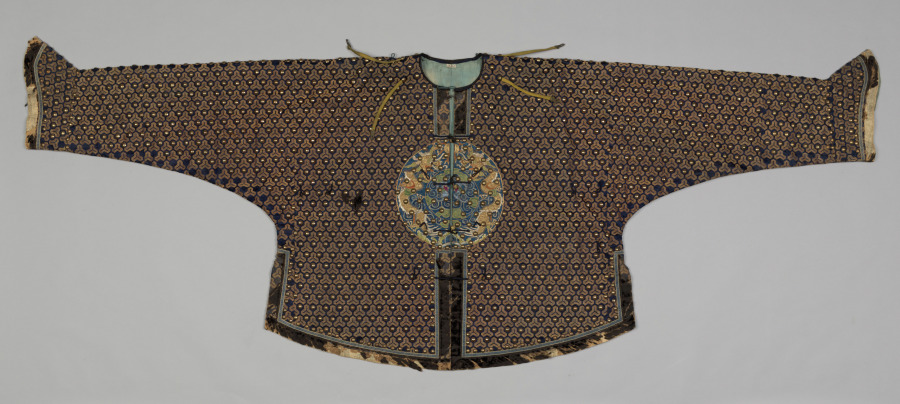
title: Ceremonial Uniform: Jacket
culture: China, Qing dynasty (1644-1911)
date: 1644–1911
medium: satin weave silk with gold metal thread embroidery; supplementary weft; black velvet; metal (brass?); lined in blue silk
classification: Arms and Armor